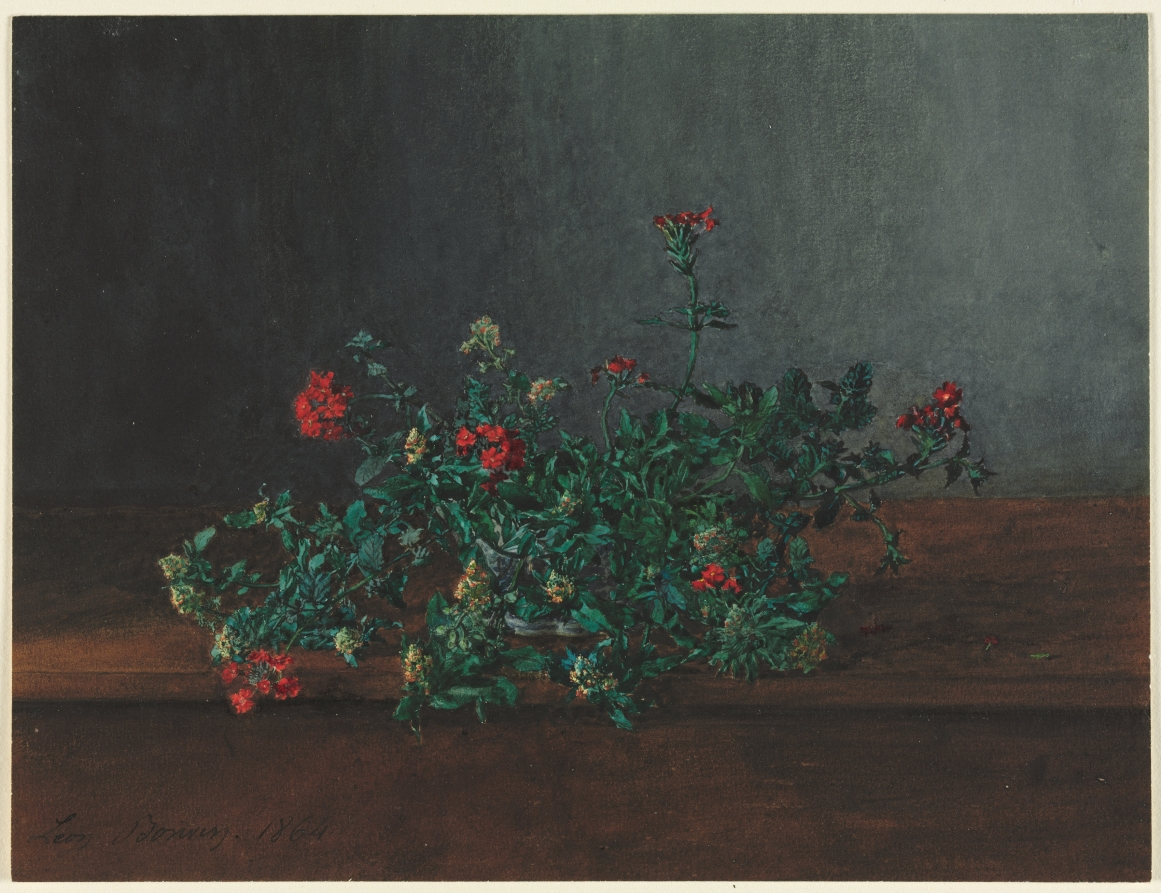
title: Still Life with Wild Flowers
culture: France, 19th century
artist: Léon Bonvin (French, 1834–1866)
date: 1864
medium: watercolor and gouache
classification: Drawing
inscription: signed, lower left, in black ink: Léon Bonvin. 1864.